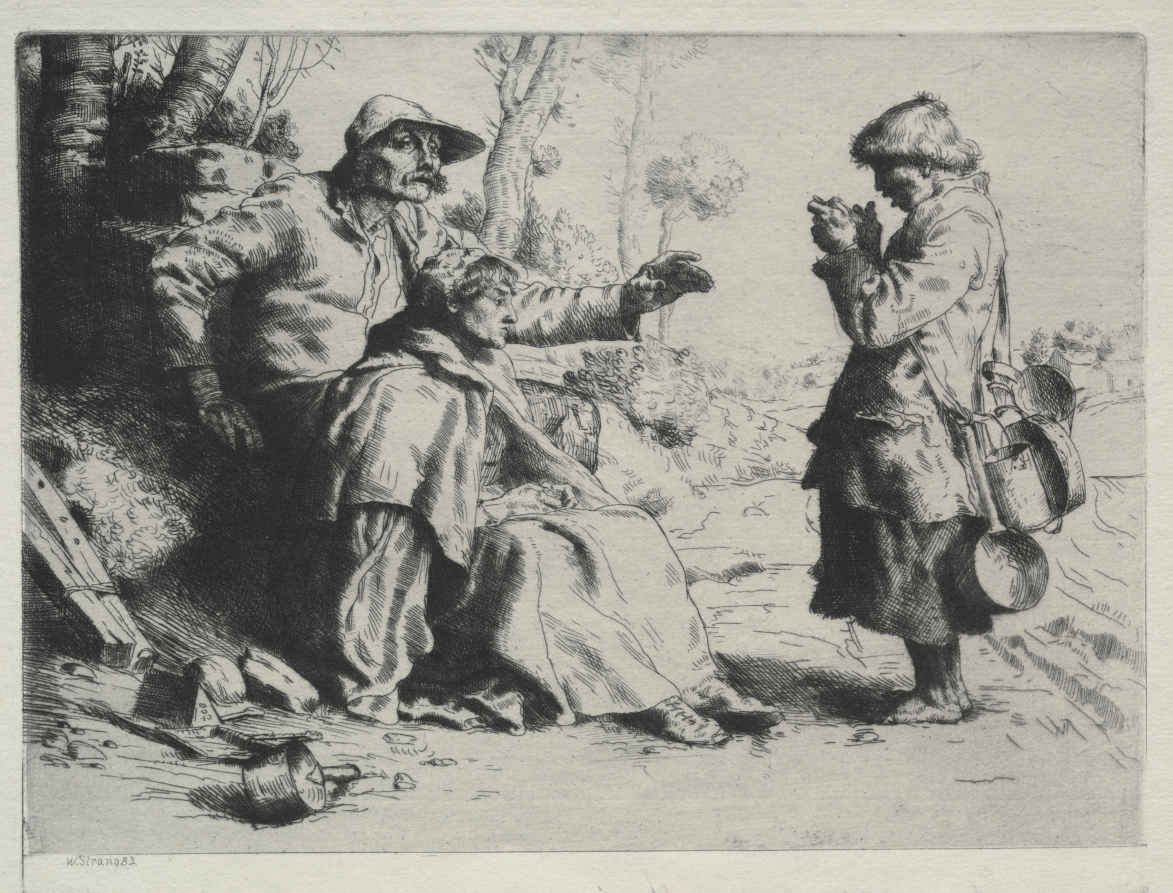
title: Tinkers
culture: England, 19th century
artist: William Strang (British, 1859–1921)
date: 1882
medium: etching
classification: Print